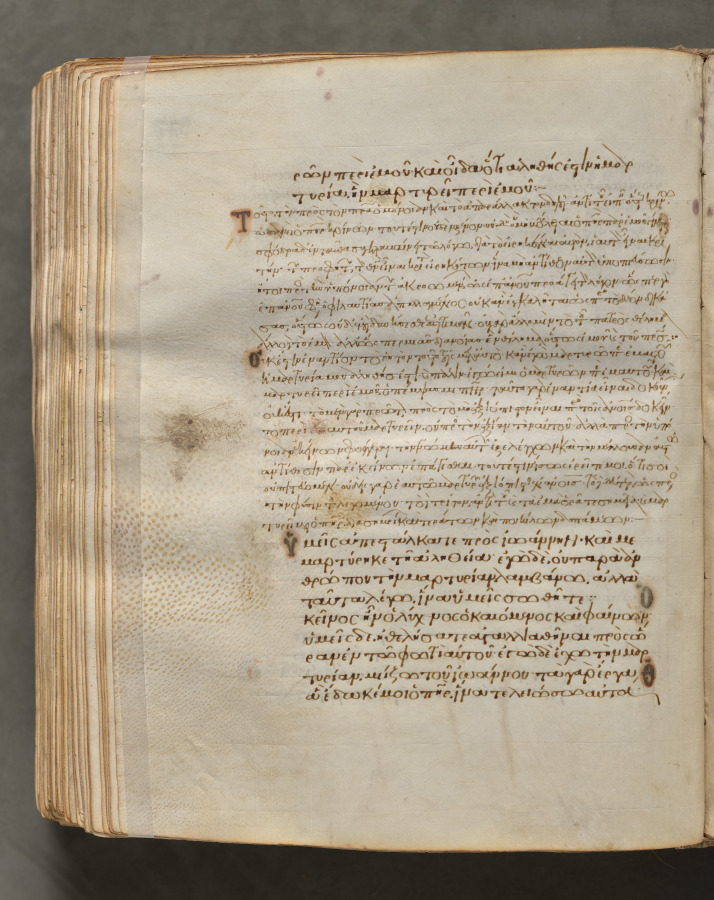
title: Text, folio 346 (verso), from a Gospel Book with Commentaries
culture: Byzantium, Constantinople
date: c. 1000–1100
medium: ink, tempera, and gold on vellum; leather binding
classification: Bound Volume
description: Each of the four gospels in this book opens on a page with brilliantly illuminated borders depicting the author of the text as well as birds—principally peacocks, symbols of the immortality of the soul—and fountains, representing the fountain of life and the salvation of the soul. This volume consists of 428 leaves with texts in Greek. Its level of sophistication suggests that it was probably written and decorated in a monastery in Constantinople.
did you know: Gospel books were carried in procession through Byzantine churches.